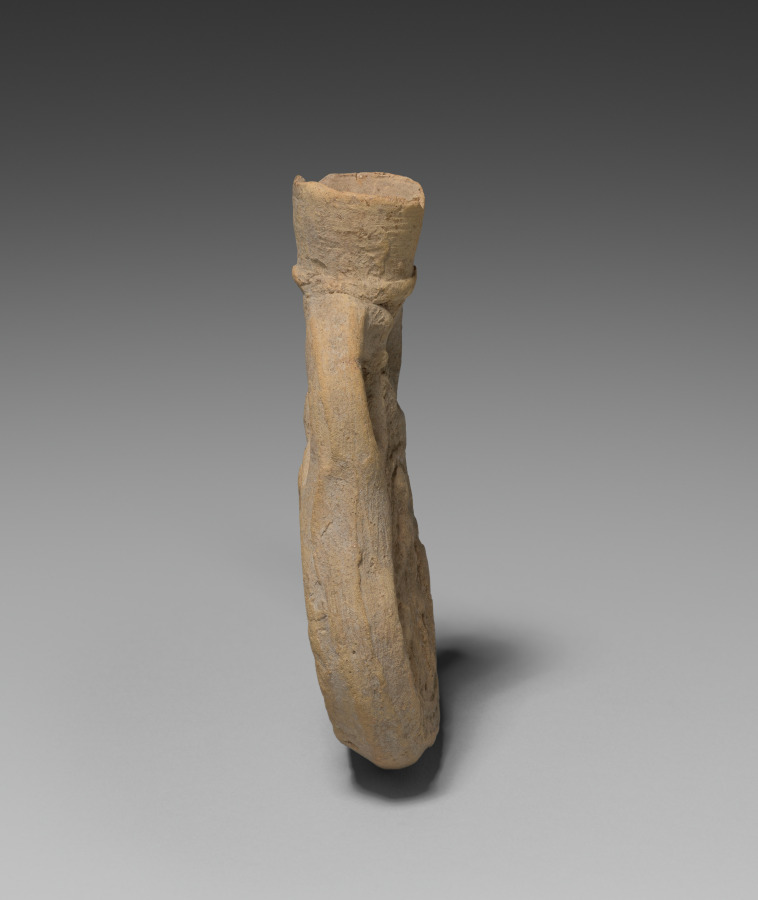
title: Pilgrim's Flask with Saint Menas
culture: Egypt, Coptic period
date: 400–600 CE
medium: terracotta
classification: Ceramic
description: These flasks bear the image of Saint Menas, an early martyr of the Christian Church whose shrine was in the desert southwest of Alexandria in Egypt. These flasks were probably used by pilgrims to hold oil taken from the lamp that burned over this saint's tomb. Probably manufactured near the shrine, pilgrim's flasks often bear decorations hinting at their place of origin, as is the case here.